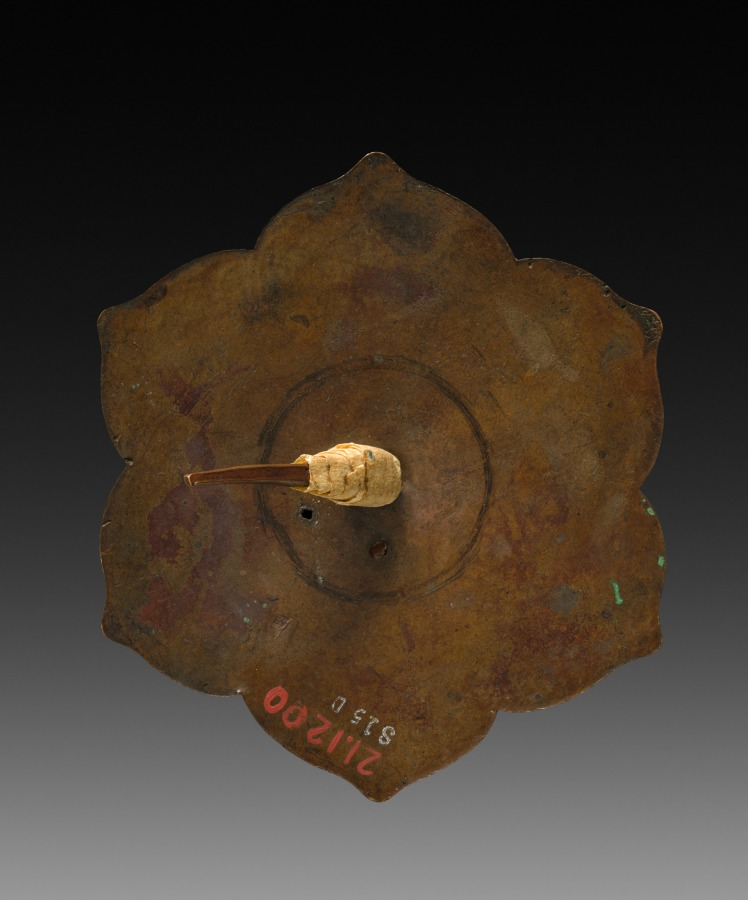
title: Gilt Nail Head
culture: Japan, Edo period (1615–1868)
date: c 1800s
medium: gilt bronze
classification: Metalwork